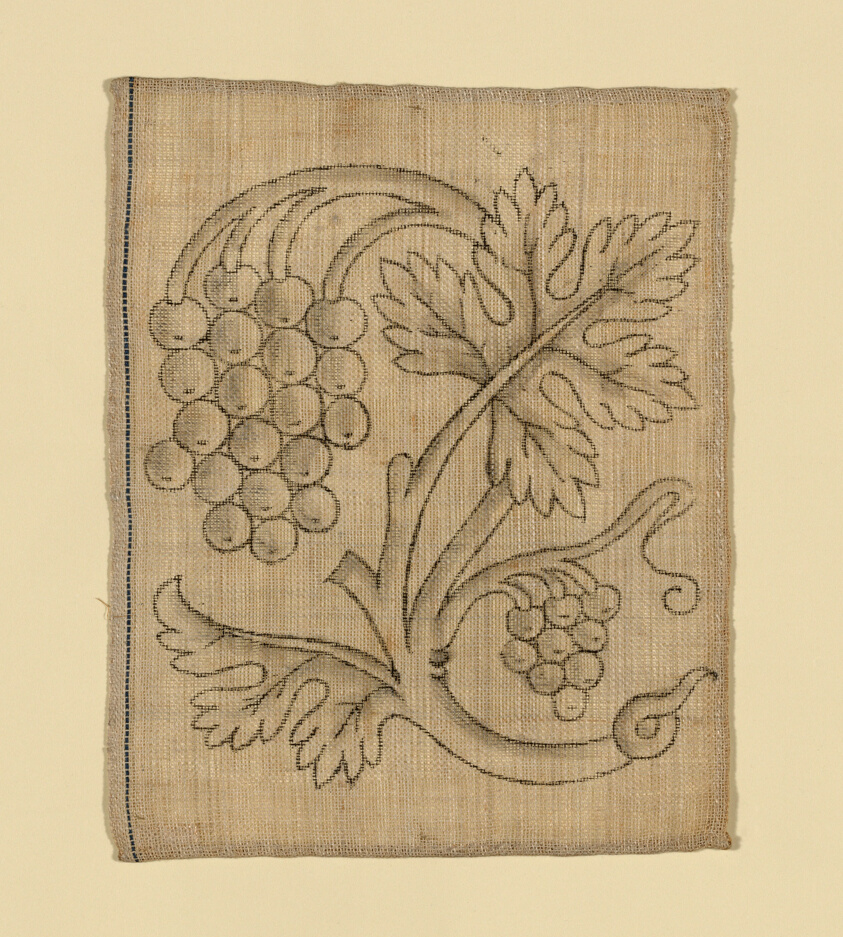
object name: Textile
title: Slip (Unfinished)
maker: England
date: 1590/1640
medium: Linen, plain weave with drawing in pencil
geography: England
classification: textile; patterns (guides); needlework (visual works); accessories (object genre)